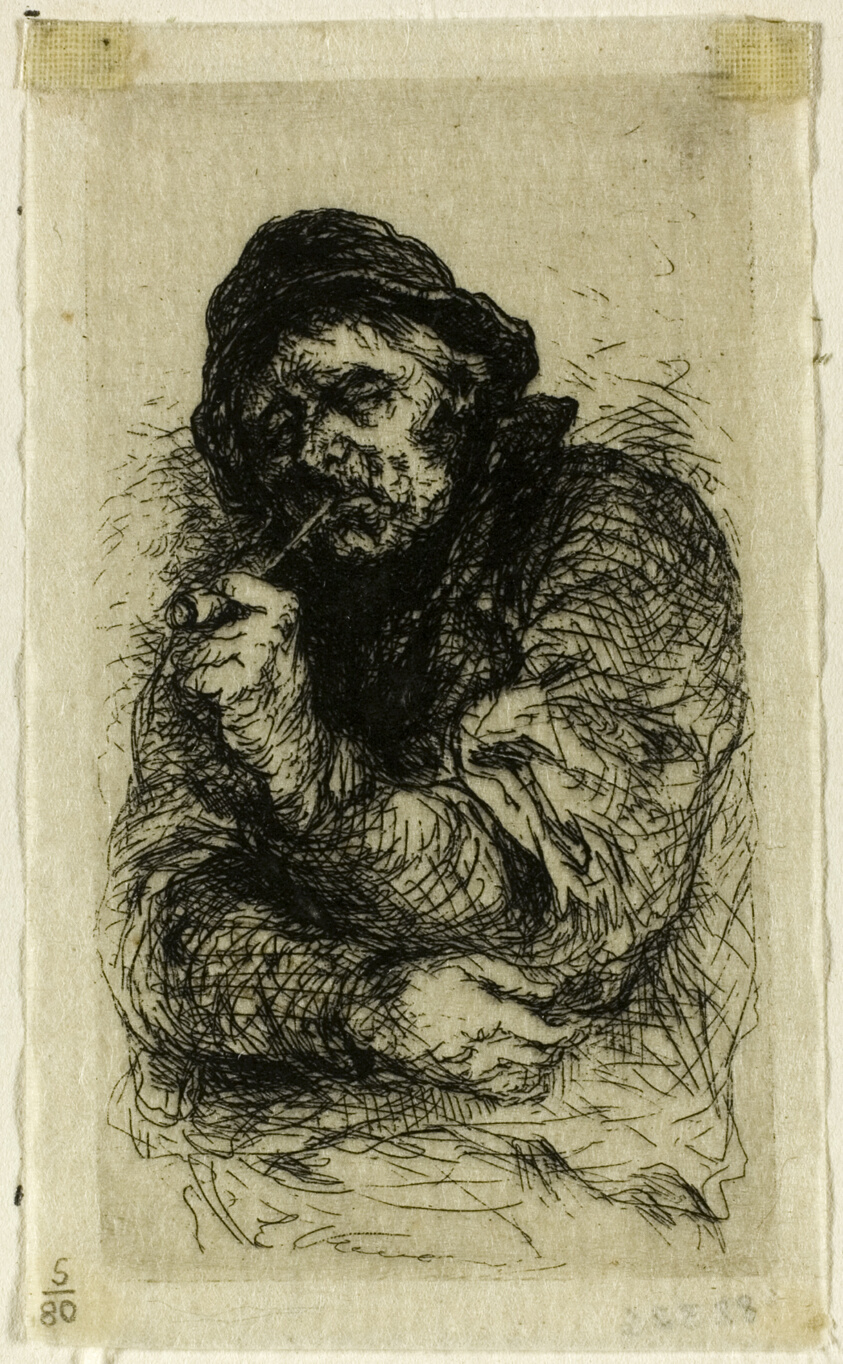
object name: Print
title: The Old Sailor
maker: Jozef Israëls (Dutch, 1824-1911)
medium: Etching on paper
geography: Holland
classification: etching; print; prints and drawing